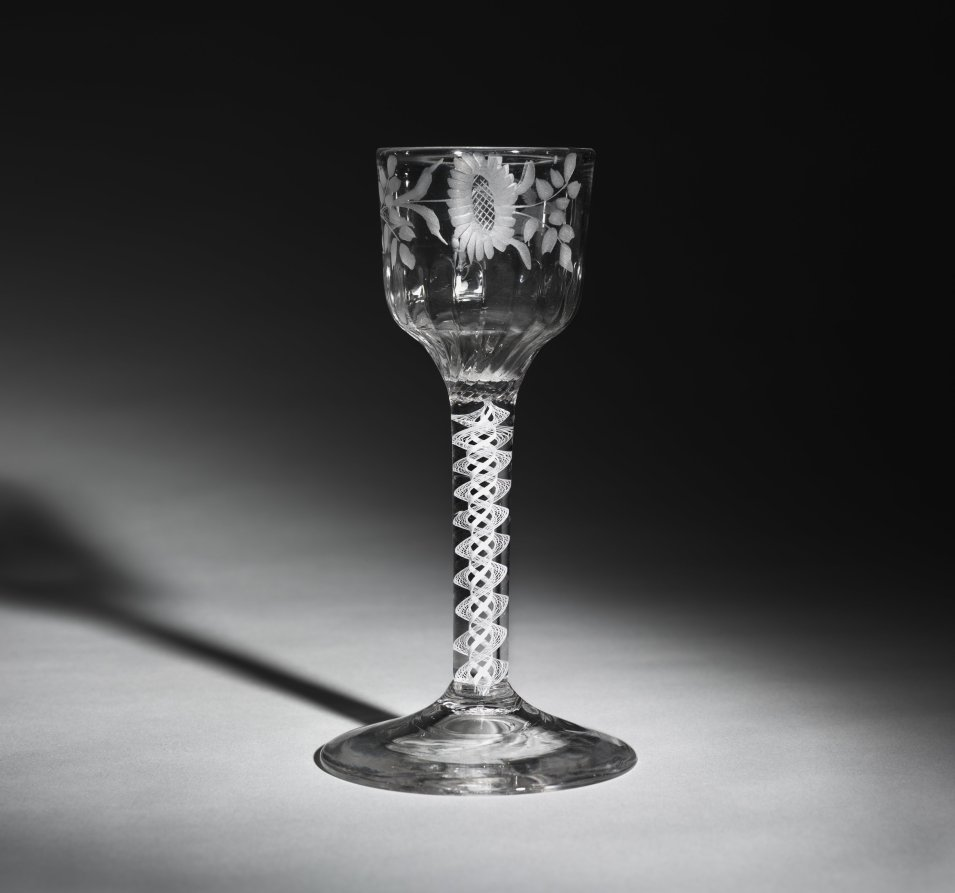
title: Goblet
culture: England, 18th century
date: c. 1725–1750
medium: glass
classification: Glass